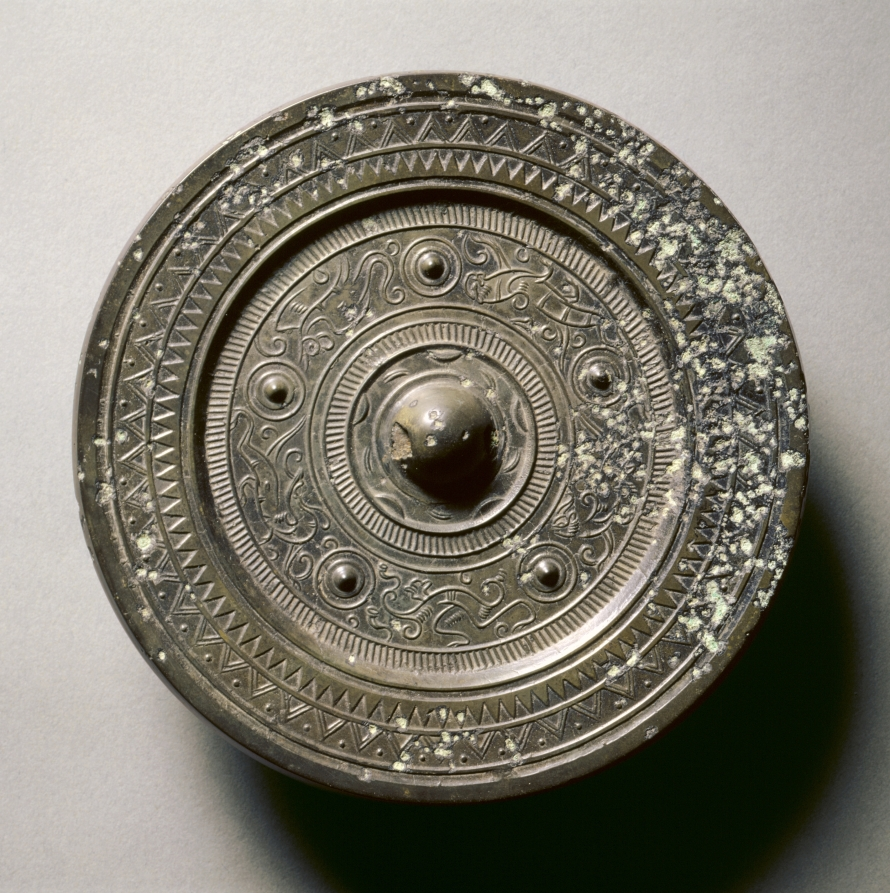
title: Mirror with Concentric Circles, an Immortal, and Auspicious Animals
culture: China, Western Han dynasty (206 BCE–8 CE)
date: 100 BCE–100 CE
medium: bronze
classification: Metalwork